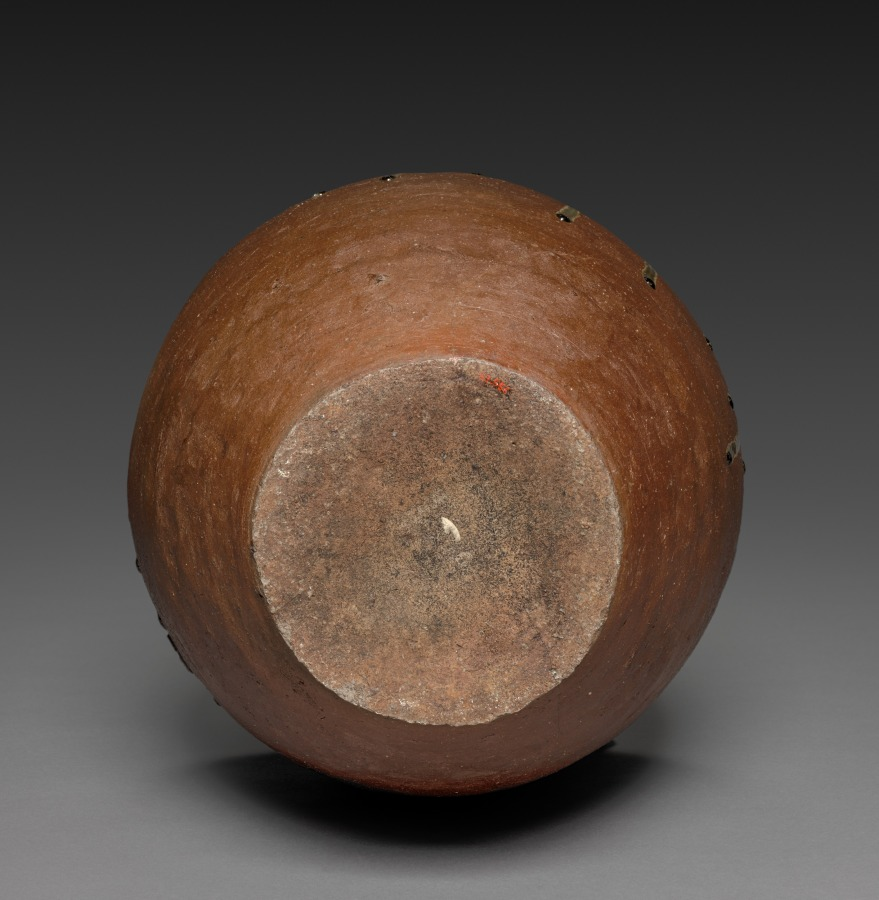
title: Water Jar: Ko Tamba ware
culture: Japan, Muromachi period (1392–1573)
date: mid-1500s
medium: stoneware with natural green ash glaze (Tamba ware)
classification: Ceramic